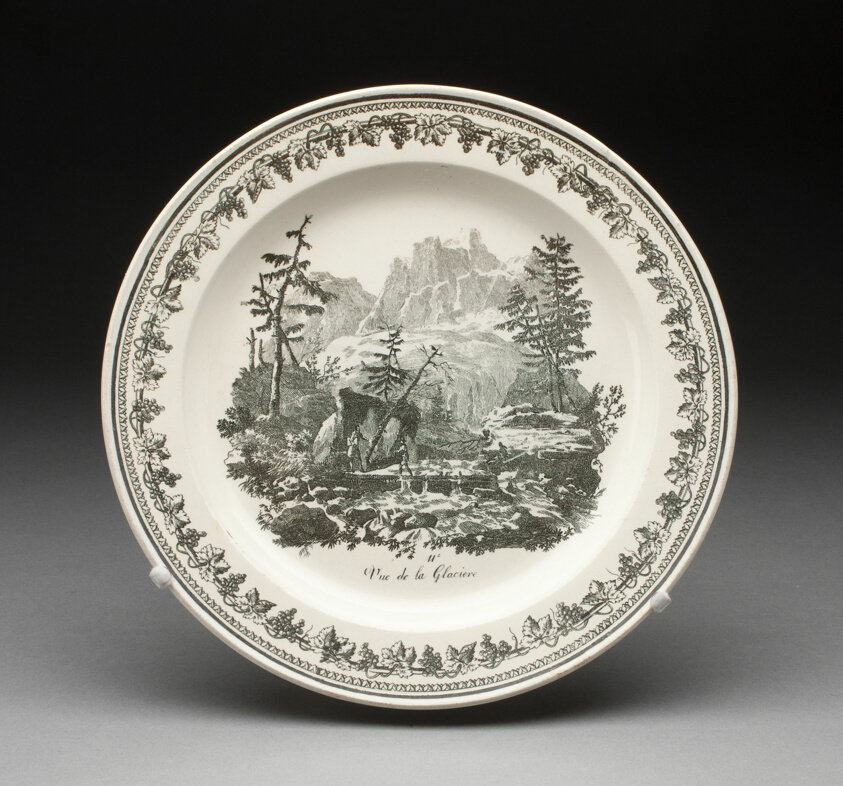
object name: Ceramics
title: Plate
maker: Creil Pottery (French, 1801-1840)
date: 1800/50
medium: Earthenware, transfer-printed (creamware)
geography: Creil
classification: plate (general, dish); earthenware; dish (vessel); creamware; european decorative arts; ceramics